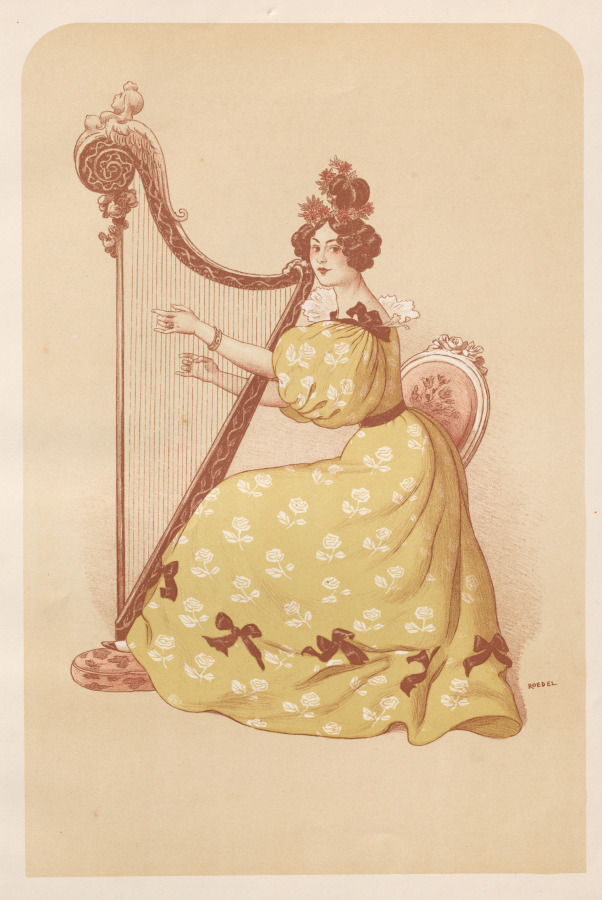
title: La Romance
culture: France, Paris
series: L'Estampe Moderne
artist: Auguste Roedel (French, 1859–1900)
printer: Imprimerie Champenois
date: 1898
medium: Color lithograph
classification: Bound Volume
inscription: In plate:lower right margin of image: ROEDEL; lower right corner of sheet: blindstamp of l'Estampe Moderne (Lugt 2790)